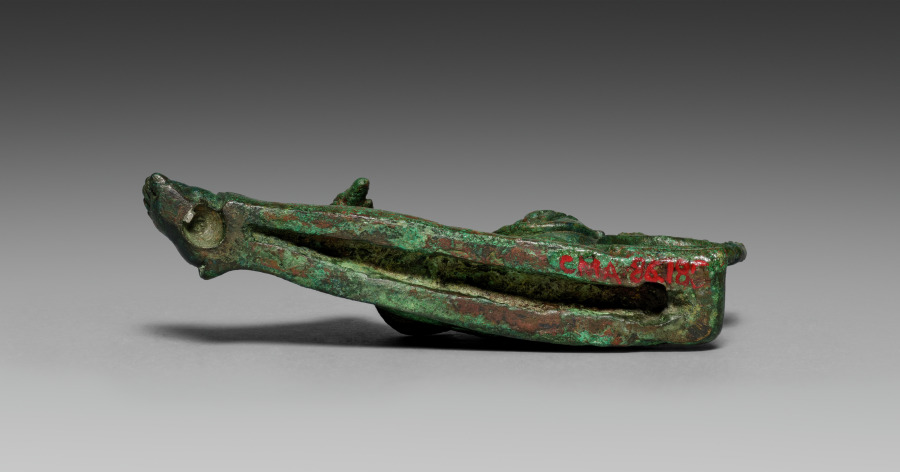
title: Vessel Ornament of Reclining Lyre-player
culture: Etruscan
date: probably 400–375 BCE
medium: bronze with gilding traces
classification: Sculpture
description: This bronze banqueter figurine was one of six once adorning the rim of a large basin, now lost. Cast in molds with individualized details, most have grooves on their underside to attach to the basin. Minute traces of gilding remain on areas of clothing and skin (mostly visible only under magnification), suggesting that they may have been completely gilded. Two handles in the form of hippocampi, horses with serpentine tails, also belonged to the basin and are now displayed at the Michael C. Carlos Museum at Emory University. The basin may have been used to hold liquid for a banquet, or was perhaps funerary. This reclining banqueter holds a lyre in his left hand and an oblong pick in his right hand. His face tilts toward the lyre and garlands hang around his head and chest. Two bare feet emerge from the bottom of the himation in a position distinct from the feet of the other figurines in this group. Some gilding remains on the top edges of the lyre and on the banqueter’s lips and drapery.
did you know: The lyre held by this banqueter bears traces of gilding.